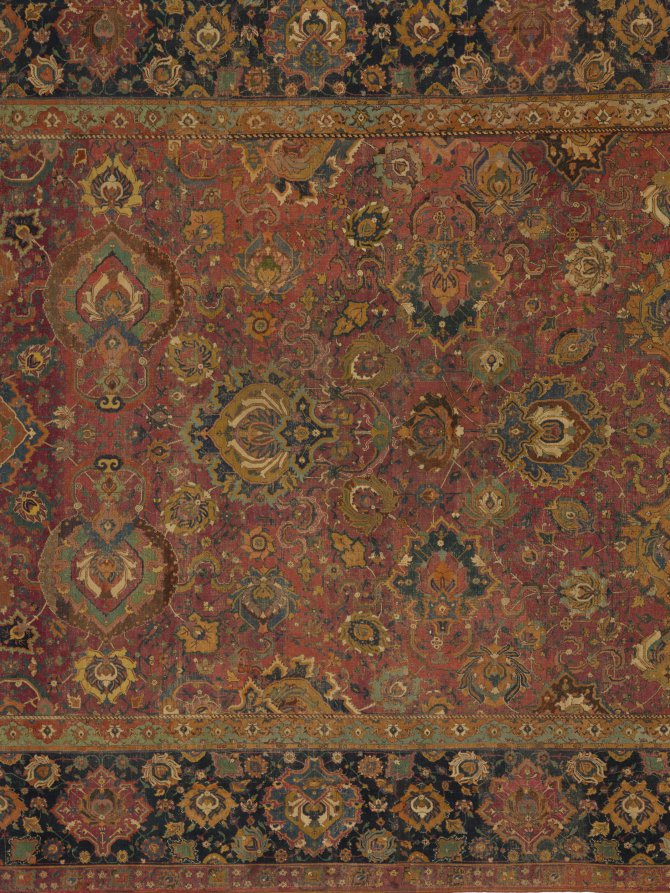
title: Carpet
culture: Iran, Herat, 16th century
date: 1500s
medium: senna knot: wool and cotton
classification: Carpet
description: The Mughals, with their nomadic Central Asian roots, were constantly on the move. They were adept at transporting the trappings of their residences and bases of operation from place to place. Fine carpets and canopies demarcated places of importance, and could be rolled up and moved when the ruler was ready to consolidate his power at a new location. When they settled in stone palaces in India, the interiors were covered with carpets, lending a warmth to the spaces that cannot be felt at the sites today. This carpet is of the type that the Mughals would have acquired for their residences. Mughal paintings are filled with depictions of carpets and textiles, many ornamented, like this one, with delicate and complex palmette-dominated arabesque patterns that evoke a paradisiacal setting.